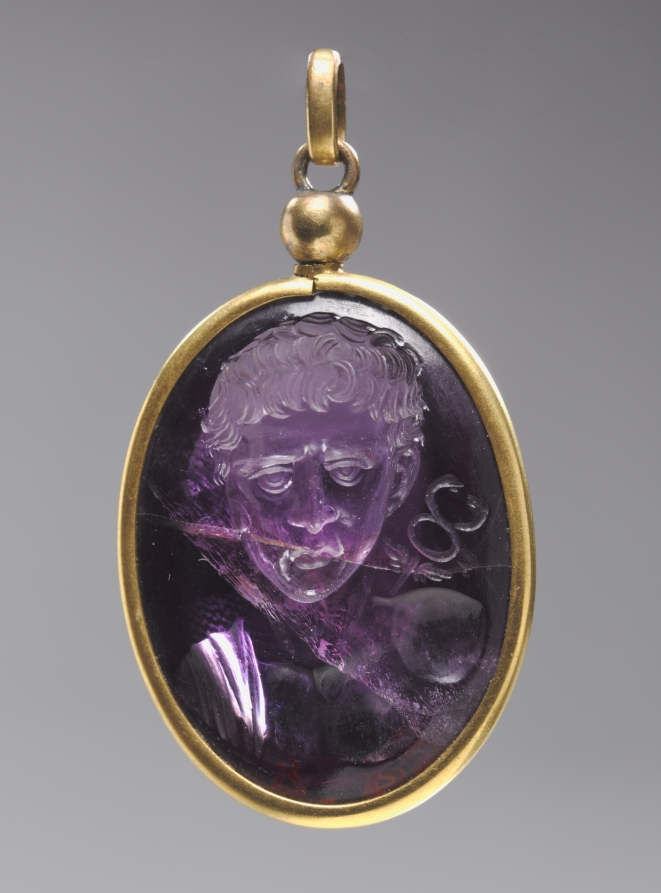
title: Intaglio with Male Portrait Bust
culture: Byzantium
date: 500s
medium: amethyst with gold mount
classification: Glyptic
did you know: While the identity of this man is unknown, his portrait, carved into this gem, preserves his likeness. His family may have commissioned this artwork to remember him by. Do you have any keepsakes that remind you of family members?